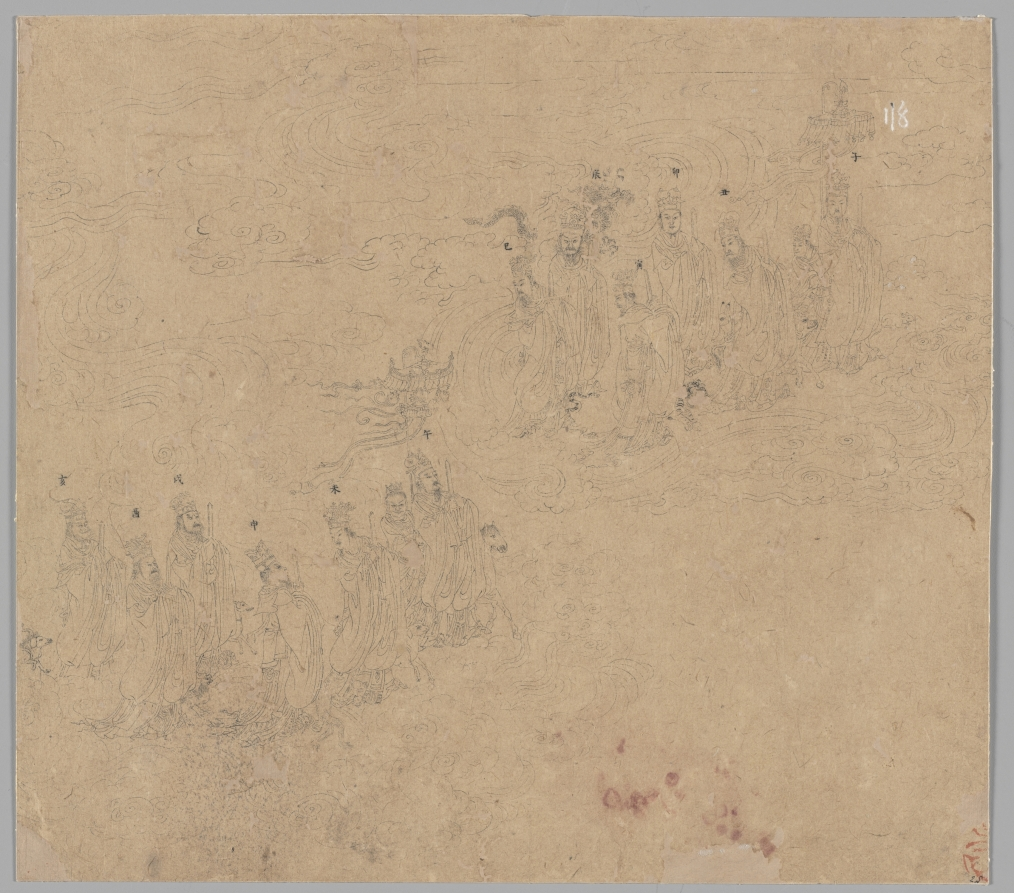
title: Album of Daoist and Buddhist Themes: Procession of Daoist Deities: Leaf 25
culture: China, Southern Song dynasty (1127-1279)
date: 1200s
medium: Album, ink on paper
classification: Painting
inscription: 子; 丑; 卯; 寅; 辰; 巳; 午; 未; 申; 戌; 酉; 亥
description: These twelve figures are personifications of the dizhi 地支, or Earthly Branches. Each is accompanied by its corresponding animal in the Chinese zodiac. The Earthly Branches would normally be accompanied by the ten Heavenly Stems, or tiangan 天干, which suggests a missing leaf.